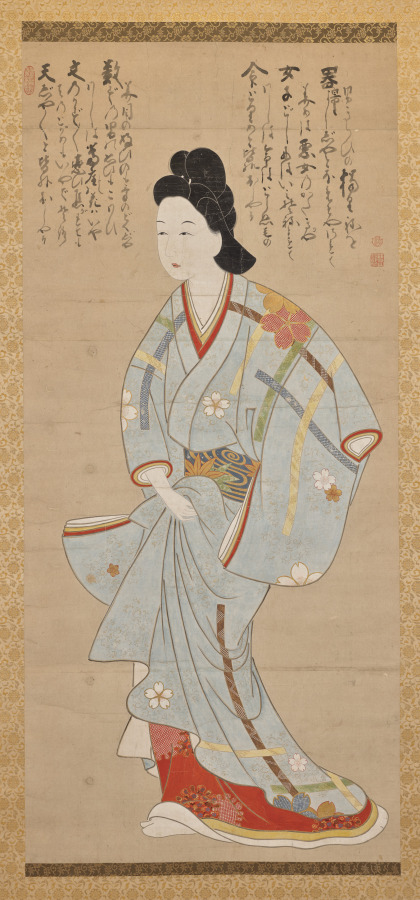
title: Figure of a Woman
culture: Japan, Edo period (1615–1868)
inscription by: Hakuin Ekaku (Japanese, 1685–1768)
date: early to mid-1700s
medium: hanging scroll; ink and color on paper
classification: Painting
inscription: Inscripton by Hakuin.